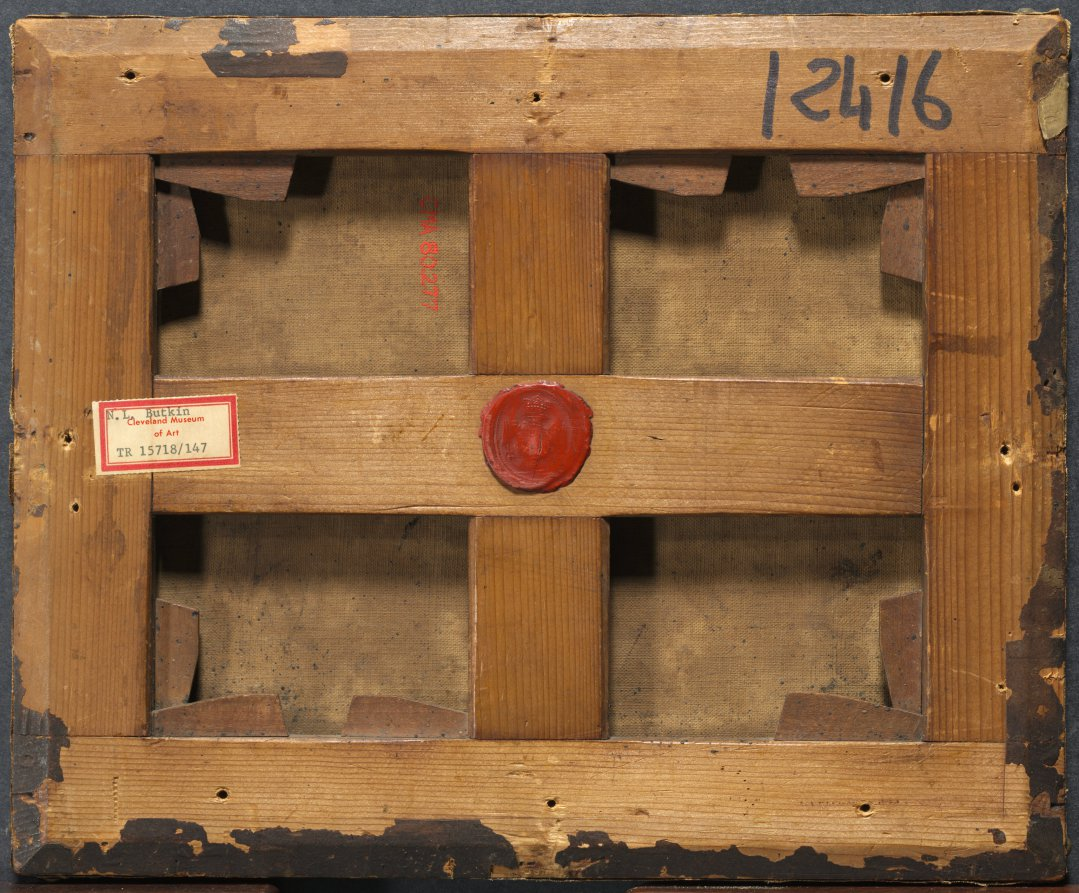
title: The Dream of Happiness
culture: France, 19th century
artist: imitator of Pierre-Paul Prud'hon (French, 1758–1823)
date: after 1819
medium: oil on fabric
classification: Painting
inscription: Signed lower right: P. Prud'hon